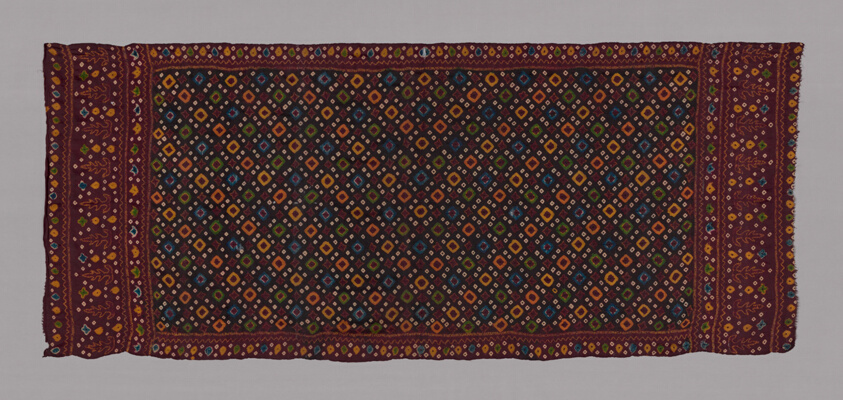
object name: Textile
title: Tampan (Ceremonial Cloth)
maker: Paminggir (Indonesia, South Sumatra, Lampung)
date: 19th century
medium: Cotton, plain weave with supplementary patterning wefts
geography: Indonesia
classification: textile; weaving; costume